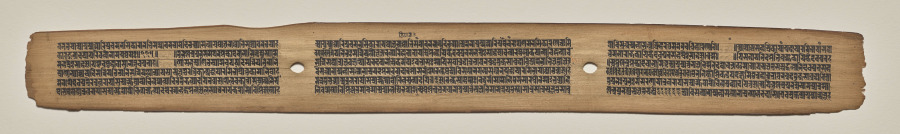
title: Text, Folio 12 (recto), from a Manuscript of the Perfection of Wisdom in Eight Thousand Lines (Ashtasahasrika Prajnaparamita-sutra)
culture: Eastern India, Bihar, Vikramashila Monastery. Painting: Nepal, Kathmandu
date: Sunday, September 14, 1119 (year 239 of the Newar Samvat in the month of Ashvina)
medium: gum tempera and ink on palm leaves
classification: Painting